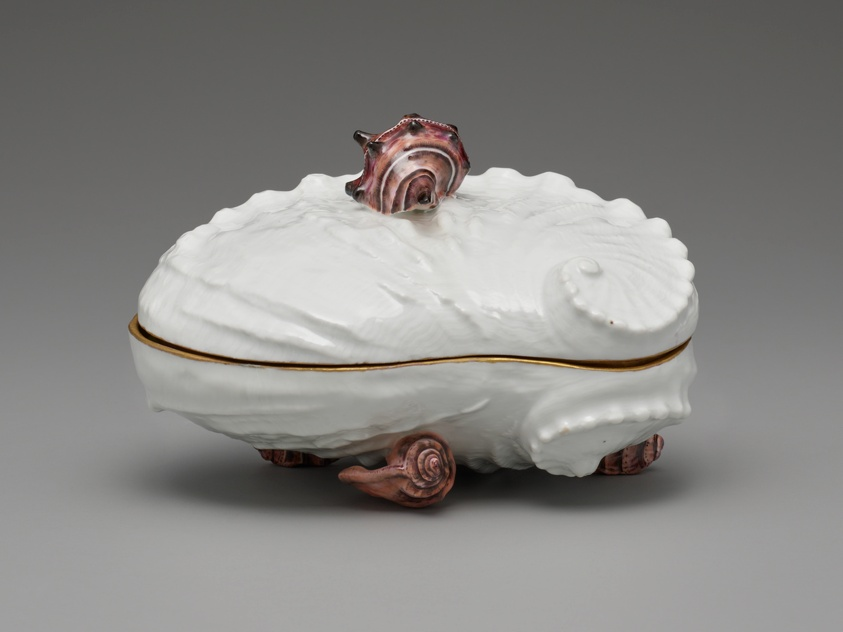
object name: Ceramics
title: Sweetmeat Box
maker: Meissen Porcelain Factory (German, founded 1710); Modeled by J. F. Eberlein (German, 1696-1749)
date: 1746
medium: Hard-paste porcelain, polychrome enamels, and gilt metal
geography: Meissen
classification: porcelain; box; ceramics; enamel; european decorative arts; metal; vessel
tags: shells, seas